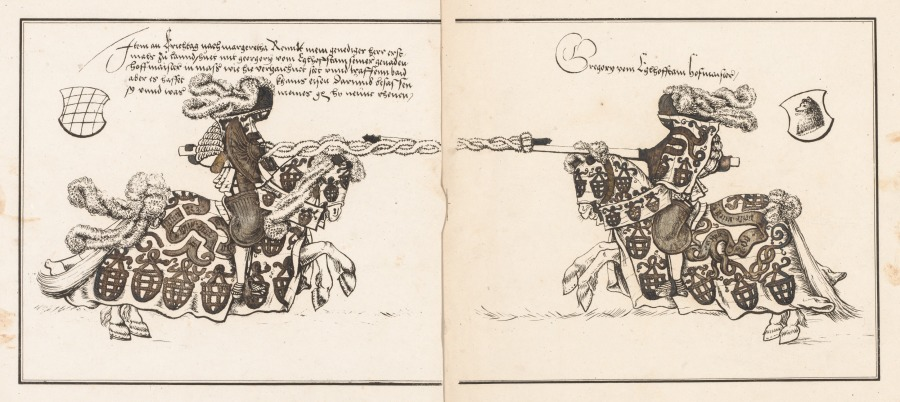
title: Book on Tournaments: Jouster Facing Right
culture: Germany, 19th century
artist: Theobald Senefelder (German, 1777–1846)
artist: and Clemens Senefelder (German, 1778–1813)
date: 1817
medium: lithograph, hand colored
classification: Print